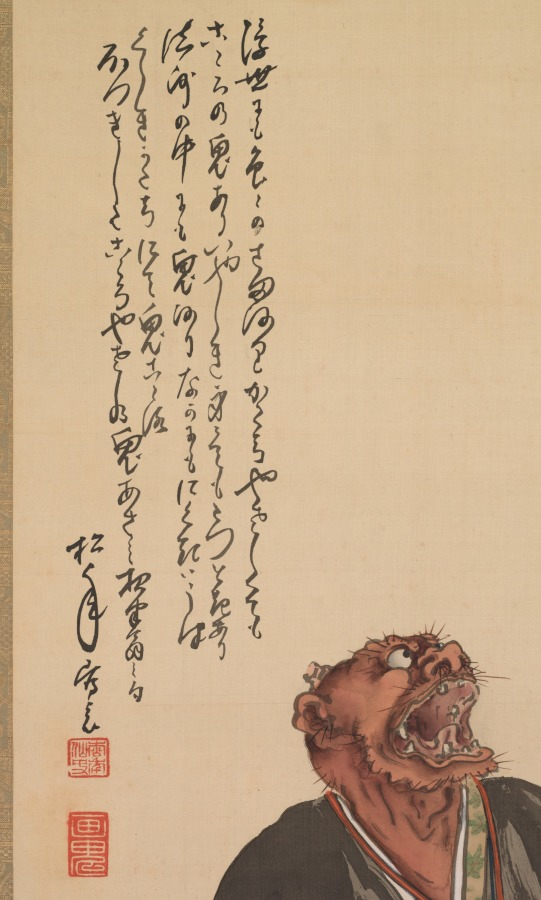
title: Demon Intoning the Name of the Buddha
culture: Japan, Meiji period (1868–1912)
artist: Suzuki Shōnen (Japanese, 1849–1918)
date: late 1800s–early 1900s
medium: hanging scroll; ink and color on silk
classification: Painting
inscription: artist's inscription, signature, and seal upper left.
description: Among the subjects of souvenir paintings made since the 1600s in Ōtsu, a travel hub near Kyoto in western Japan, was a demon in monk’s robes reciting the name of the Buddha Amida to the rhythm of his gong. Ōtsu paintings largely disappeared with the advent of rail travel in the late 1800s, as people no longer stopped in the area. In this work, Kyoto-based artist Suzuki Shōnen reimagined the demon for the modern era—the simple figure from the Ōtsu painting is transformed into a realistic one accompanied by a calligraphic meditation on its nature.